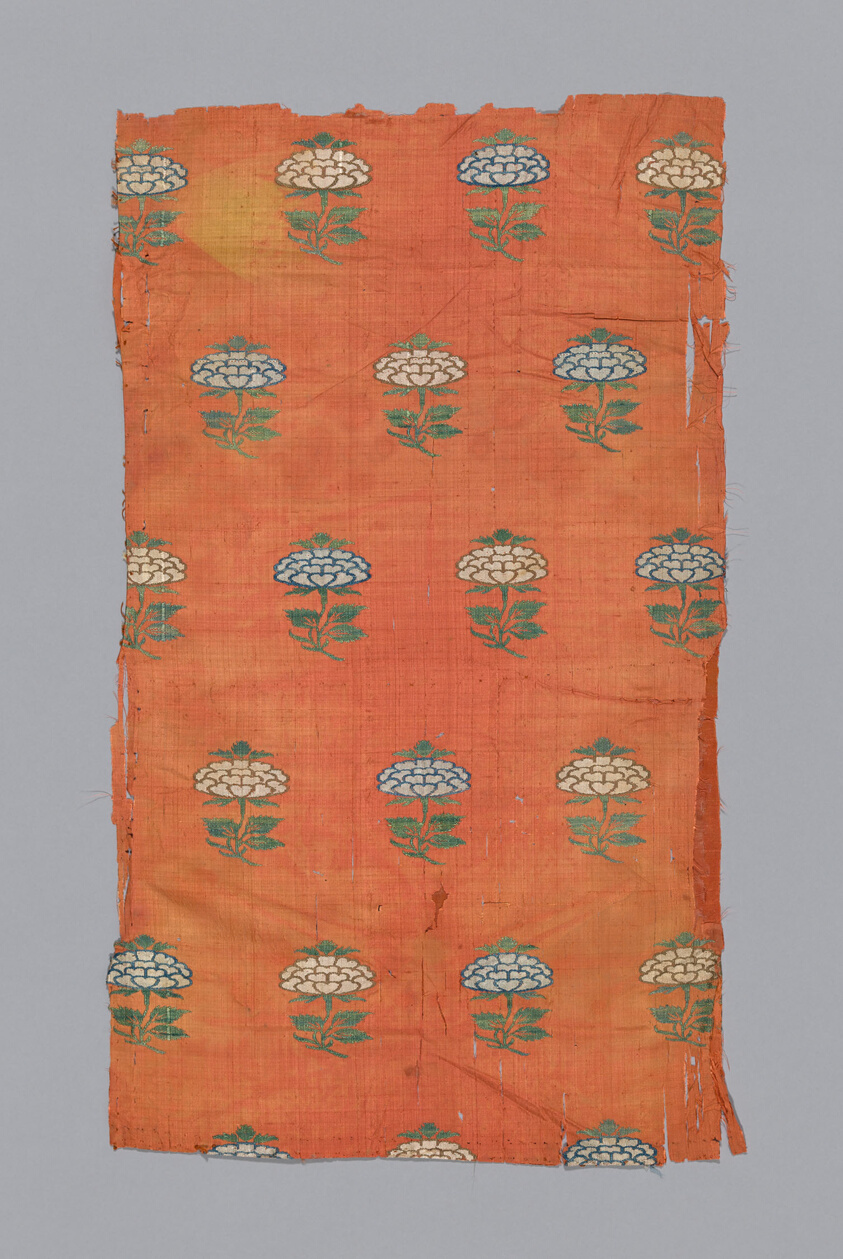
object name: Textile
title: Panel (Dress Fabric)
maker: Iran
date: 1625/75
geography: Iran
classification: textile; weaving